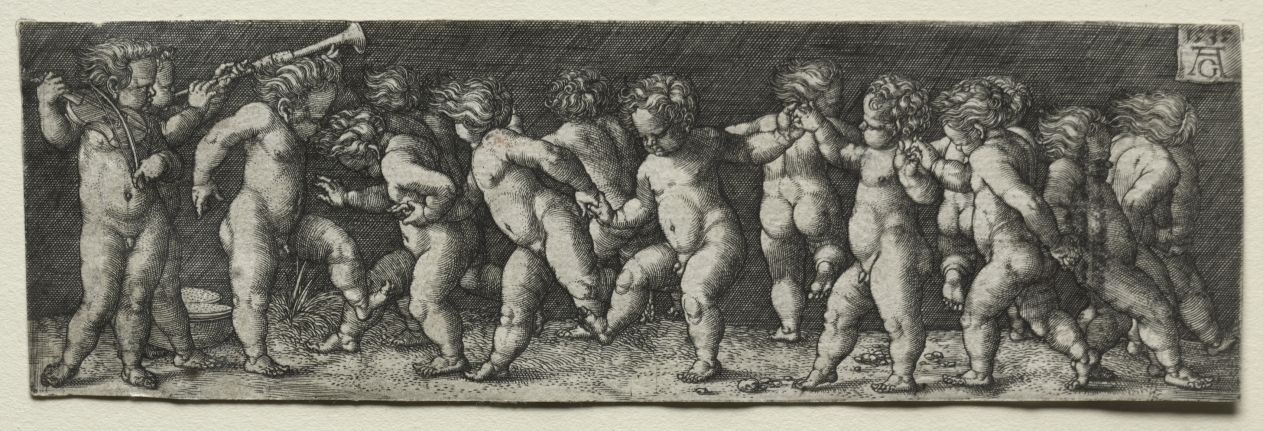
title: Fifteen Nude Children Dancing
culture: Germany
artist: Heinrich Aldegrever (German, 1502–1555/61)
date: 1535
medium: engraving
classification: Print